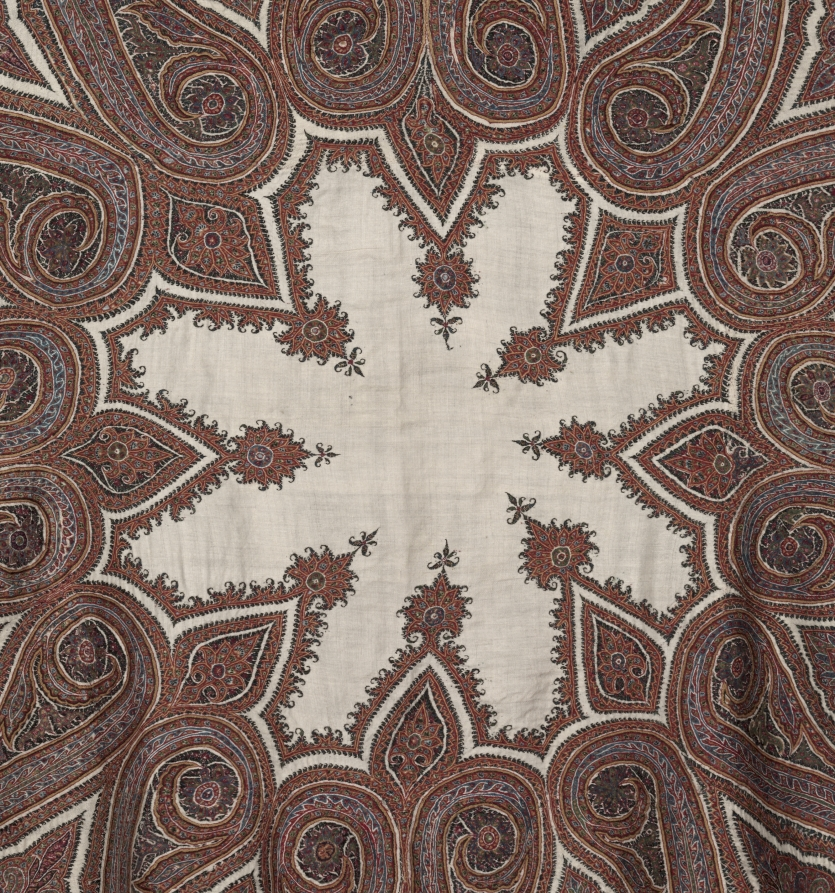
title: Square Shawl ("amli")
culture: India, Kashmir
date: mid-1800s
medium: Wool: embroidery (large-pieced areas)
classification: Embroidery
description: The central white medallion radiates into a swirling pattern of rosettes and teardrop-shaped “tree-of-life” motifs, also known as paisley, that spread over the entire surface. In the border is an undulating vine and a row of gate-like elements filled with individual trees. Kashmiri shawls were signs of high social status in India. Beginning in the late 1700s, the shawls were also coveted throughout Europe and America, until they began to fall out of fashion during the 1870s.